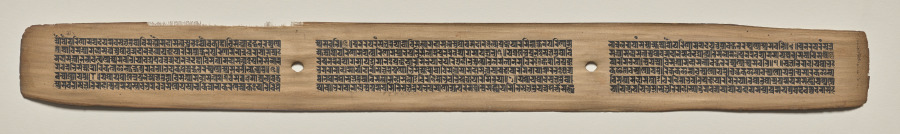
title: Text, Folio 122 (recto), from a Manuscript of the Perfection of Wisdom in Eight Thousand Lines (Ashtasahasrika Prajnaparamita-sutra)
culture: Eastern India, Bihar, Vikramashila Monastery. Painting: Nepal, Kathmandu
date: Sunday, September 14, 1119 (year 239 of the Newar Samvat in the month of Ashvina)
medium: gum tempera and ink on palm leaves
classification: Painting